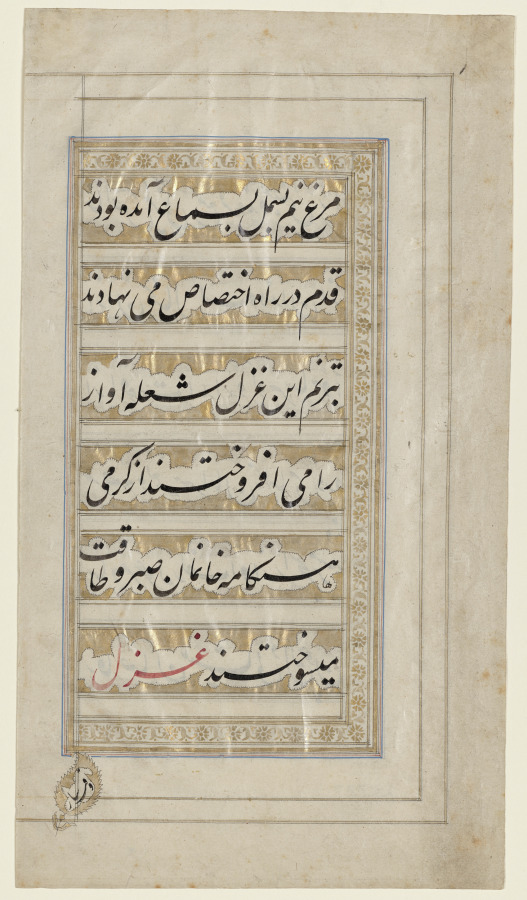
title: Page from the Poem of Beauty and Love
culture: India, Kashmir, Mughal, 19th century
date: 1848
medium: painting on paper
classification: Painting